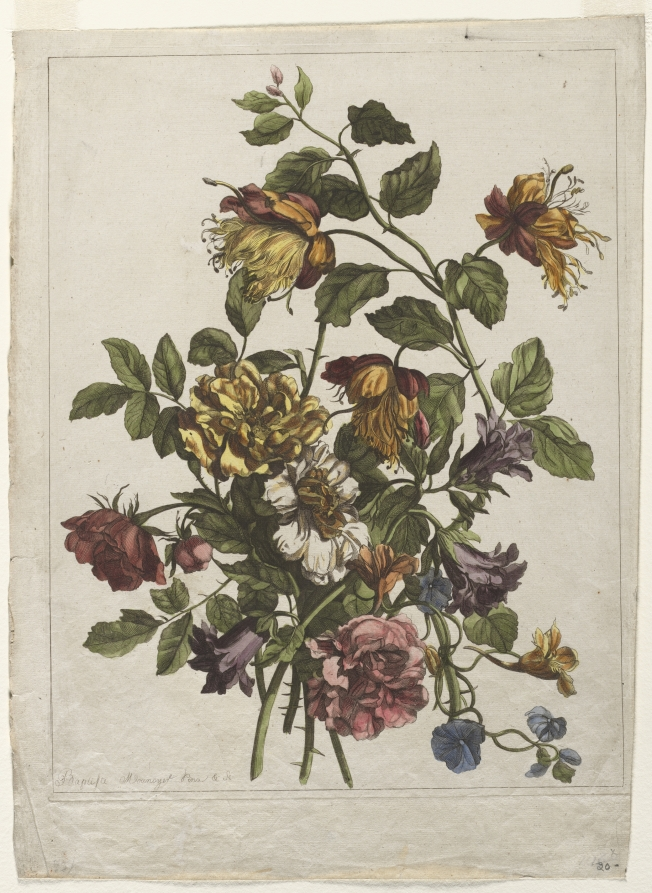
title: Bouquet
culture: France, 17th century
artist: Jean-Baptiste I Monnoyer (French, c. 1636–1699)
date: c. 1680–95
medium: etching and engraving, hand colored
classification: Print